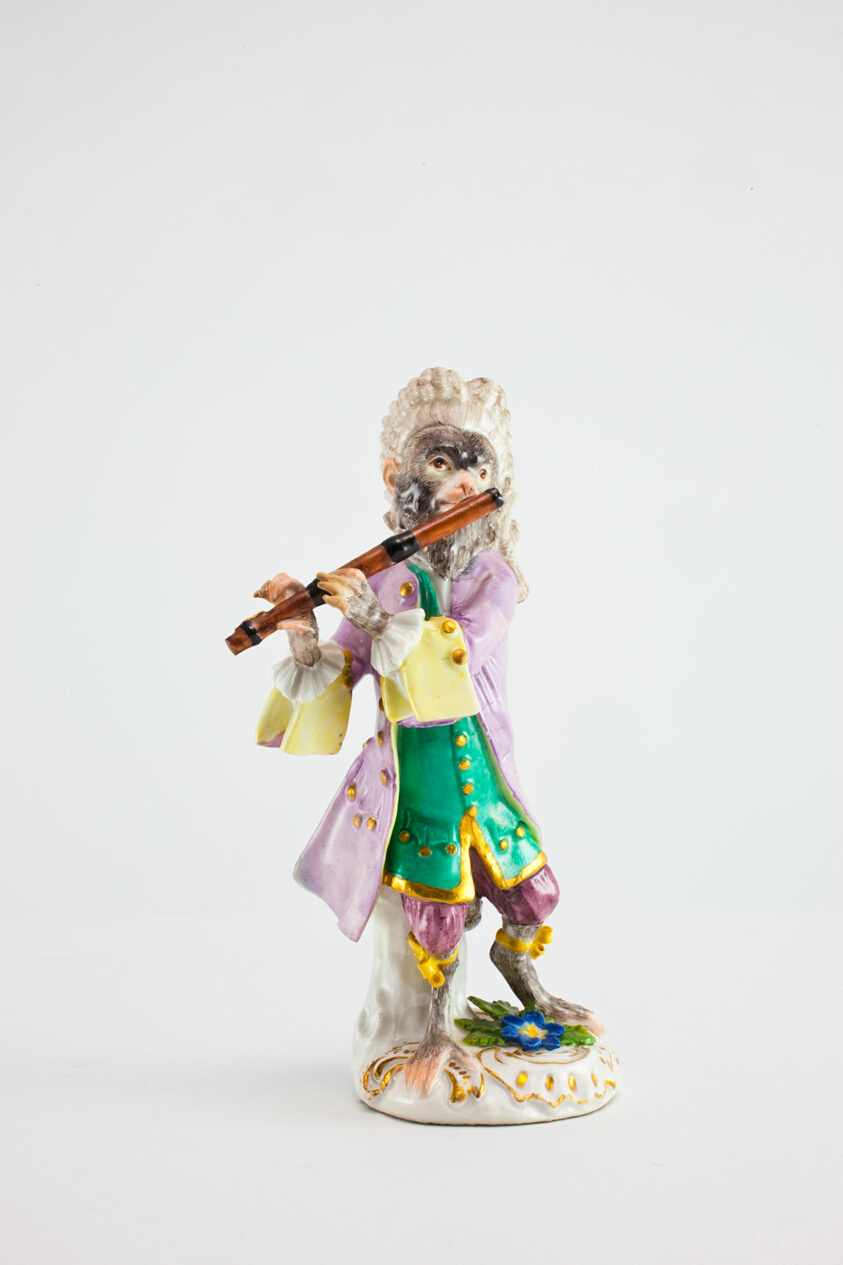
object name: Ceramics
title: Flute Player for the Monkey Band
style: Rococo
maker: Meissen Porcelain Manufactory; German, founded 1710; After a model of Kändler or Reinicke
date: c. 1765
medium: Hard-paste porcelain, polychrome enamels, andgilding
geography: Meissen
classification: sculpture; ceramics; porcelain; european decorative arts